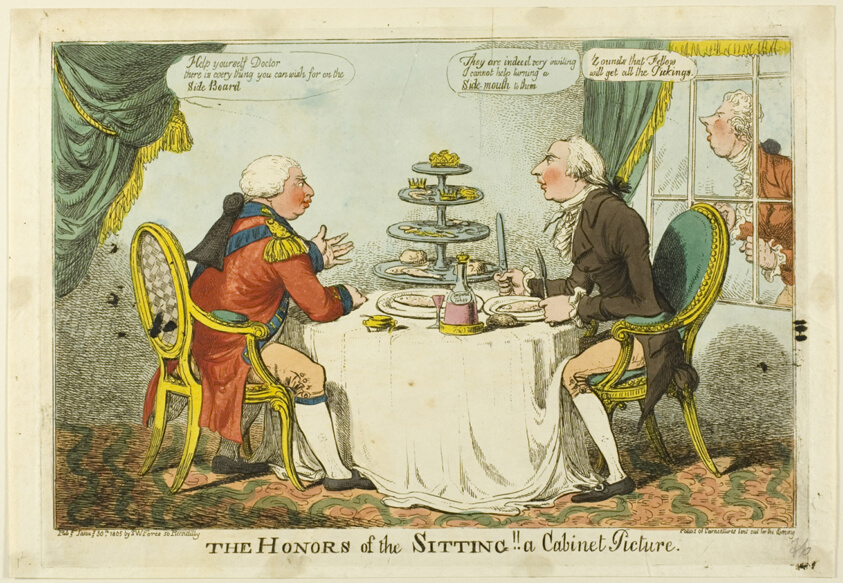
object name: Print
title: The Honors of the Sitting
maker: Charles WIlliams (English, active 1797-1830); published by S. W. Fores (English, active 1785-1825)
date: published January 30, 1805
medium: Hand-colored etching on ivory laid paper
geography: England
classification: etching; print; prints and drawing